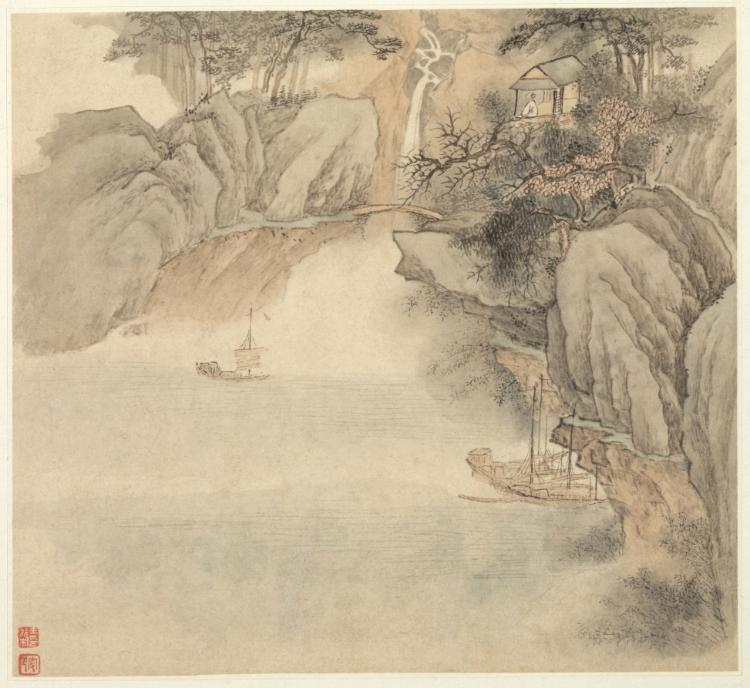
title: Album of Landscapes: Leaf 4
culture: China, Qing dynasty (1644-1911)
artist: Wang Gai (Chinese, active c. 1677–1705)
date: 1677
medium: album leaf, ink and light color on paper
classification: Painting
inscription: Poem by Mi Han-wen